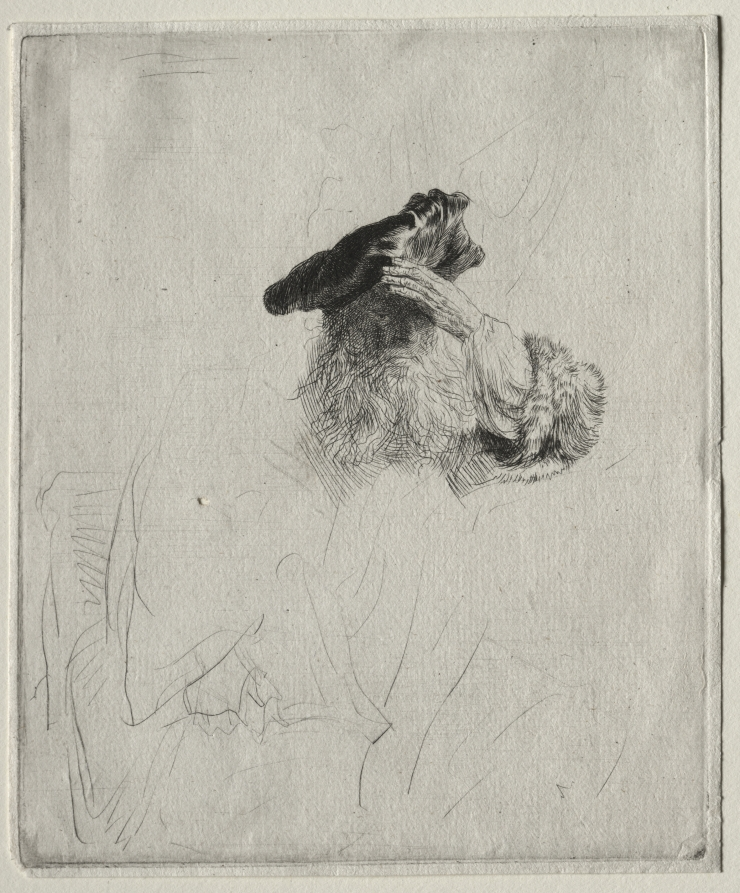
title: Old Man Shading his Eyes with His Hand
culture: Netherlands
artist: Rembrandt van Rijn (Dutch, 1606–1669)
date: c. 1639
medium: etching and drypoint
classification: Print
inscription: VERSO, lower left, in graphite: C 2310 K. 1036 MK ; lower right, in graphite: 13